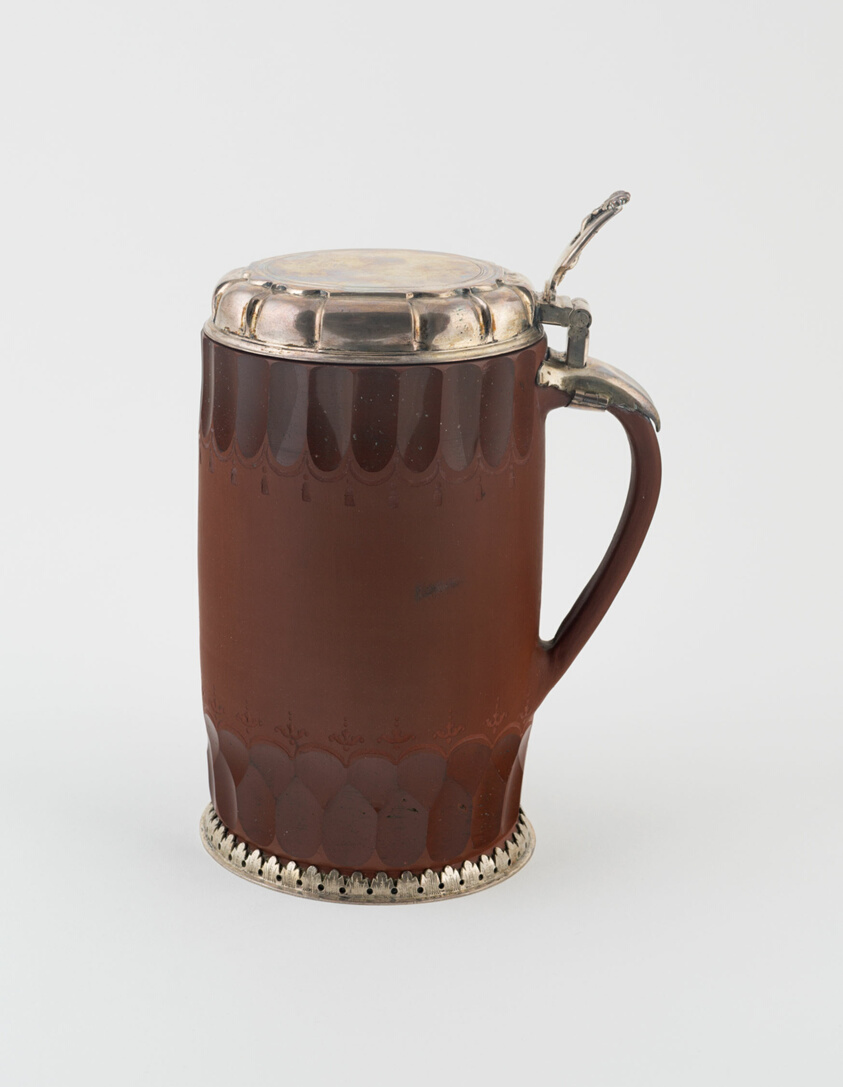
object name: Metalwork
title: Tankard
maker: Meissen Porcelain Factory; Germany, founded 1710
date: c. 1710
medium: Böttger stoneware, silver mounts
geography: Meissen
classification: drinking vessel; tableware; stoneware; european decorative arts; ceramics; metalwork